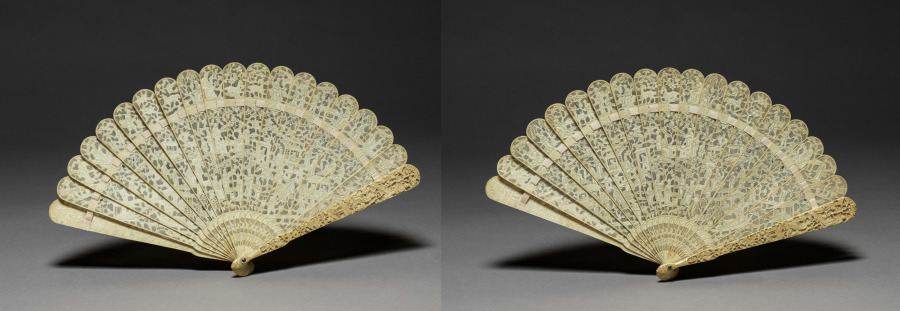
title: Fan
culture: China, 20th century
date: 1900s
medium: ivory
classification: Ivory